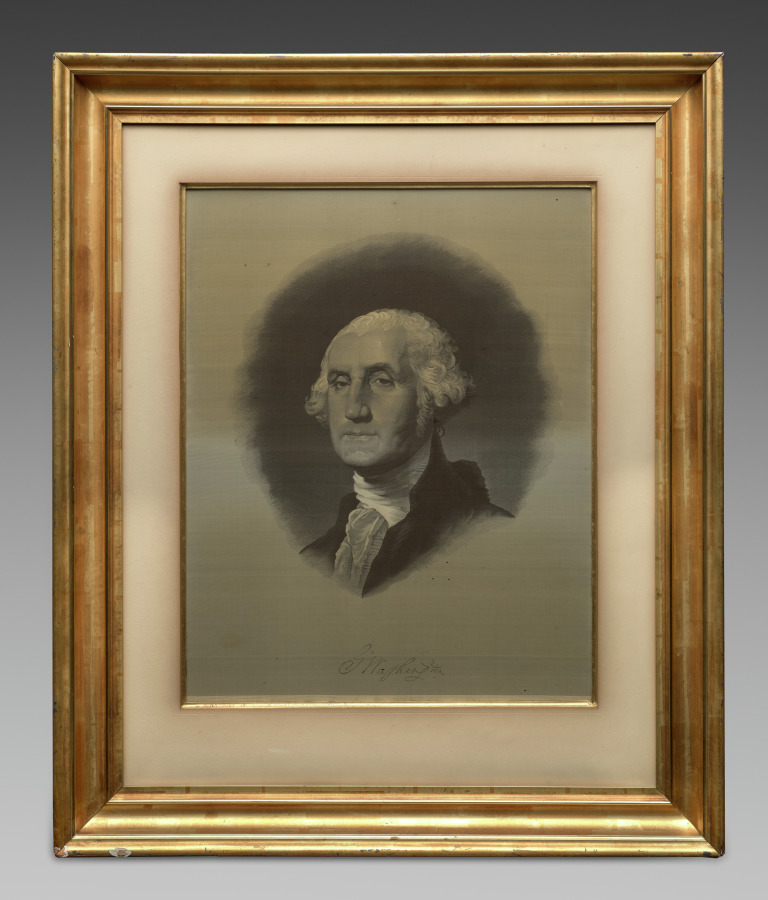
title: George Washington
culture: France, Lyon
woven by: Carquillat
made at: Maison Mathevon and Bouvard (French)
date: 1854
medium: silk, jacquard weave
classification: Textile